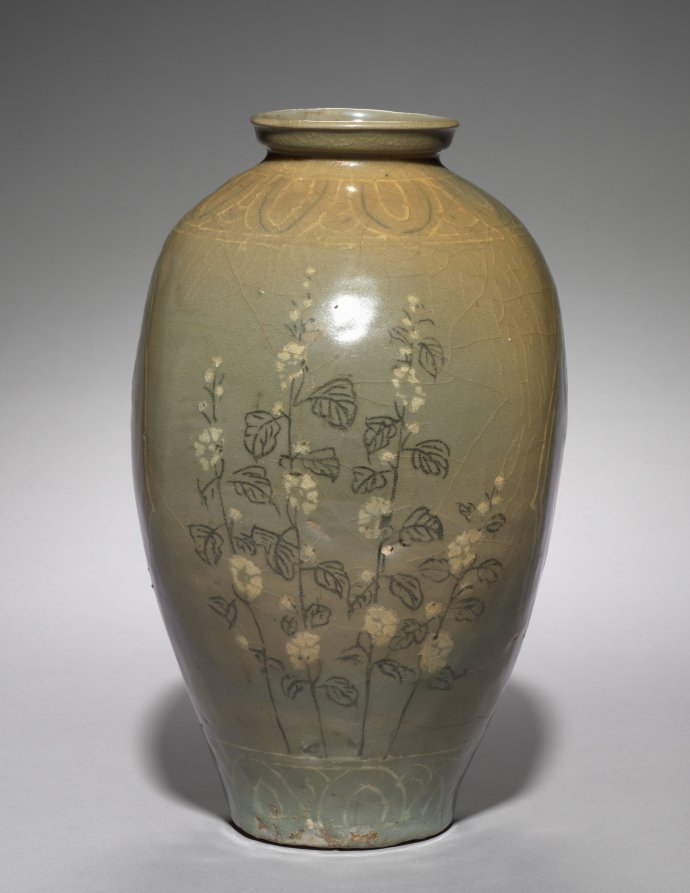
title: Flask with Inlaid Lotus Design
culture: Korea, Goryeo dynasty (918–1392)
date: 1200s–1300s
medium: stoneware, celadon with inlaid decoration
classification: Ceramic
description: Toward the late 1300s, the overall quality of techniques involved in making celadon works sharply deteriorated. In contrast to translucent greenish blue celadon works of the 1100s, this flask, possibly dated to the late 1300s, has brownish green glaze. And its inlaid design also shows a clear sign of decline in craftsmanship. Nevertheless, less attention to techniques gave way to a freer style pottery called buncheong in the succeeding centuries.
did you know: The shape of this bottle can be traced all the way back to an ancient Persian pilgrim’s flask.